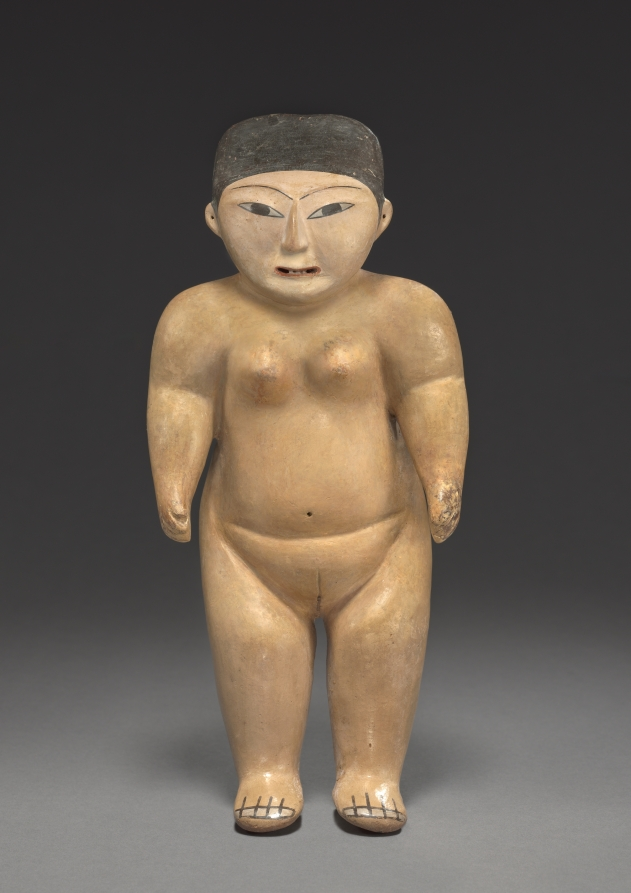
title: Female Figure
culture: Peru, South Coast, Nasca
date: 100 BCE–700 CE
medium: earthenware with colored slips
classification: Sculpture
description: This figure, which may once have worn small garments, might be a tomb offering. Her tapered head reflects the practice of cranial shaping, which may identify her social group and serve as a mark of beauty. Her fleshy hips likely refer to human and plant fertility, since food is the source of such bodily wealth. Her identity is unknown.